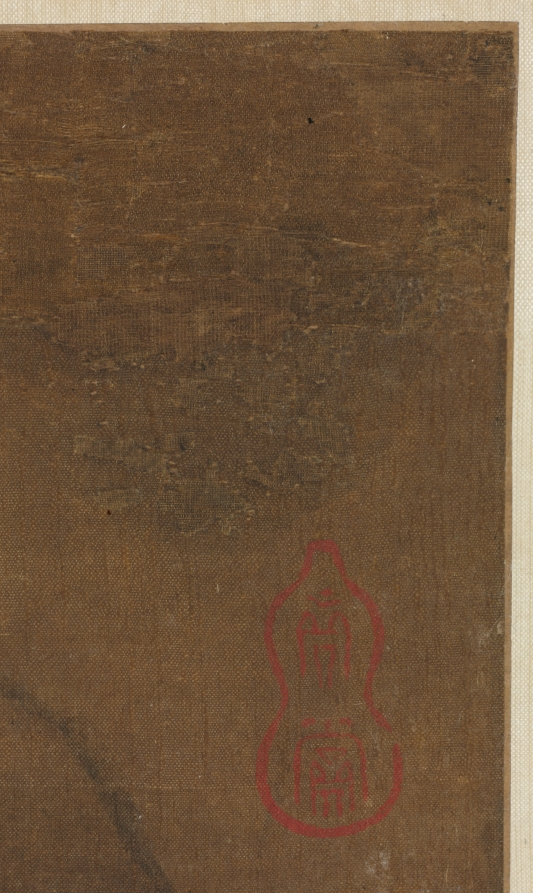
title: Summer Mountains (after Dong Yuan [active c. 937–75])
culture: China, Yuan dynasty (1271-1368)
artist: attributed to Huang Gongwang (Chinese, 1269–1354)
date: 1290–1354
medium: hanging scroll; ink and slight color on silk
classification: Painting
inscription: 【印】一峰道人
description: This monumental landscape is drawn in softly rounded strokes with darker lines frequently applied on top of lighter ones. This technique recalls one of the suggestions included in a collection of the artist's writings known as Secrets of Landscape Painting: The most difficult thing in painting is using the ink. The artist begins by using dilute ink and builds it up to the point where it begins to look right, then uses dense, black ink, applied fairly dry, and washes of deeper-toned ink. This technique distinguishes the fields from the paths, the far from the near. Huang Gongwang may have learned this technique from observing nature through the eyes of an earlier master, Dong Yuan, a painter whose style he shared.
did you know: The wet hills and moist, rich atmosphere evoke the southern Chinese summer, characterized by monsoon rains and lush growth.